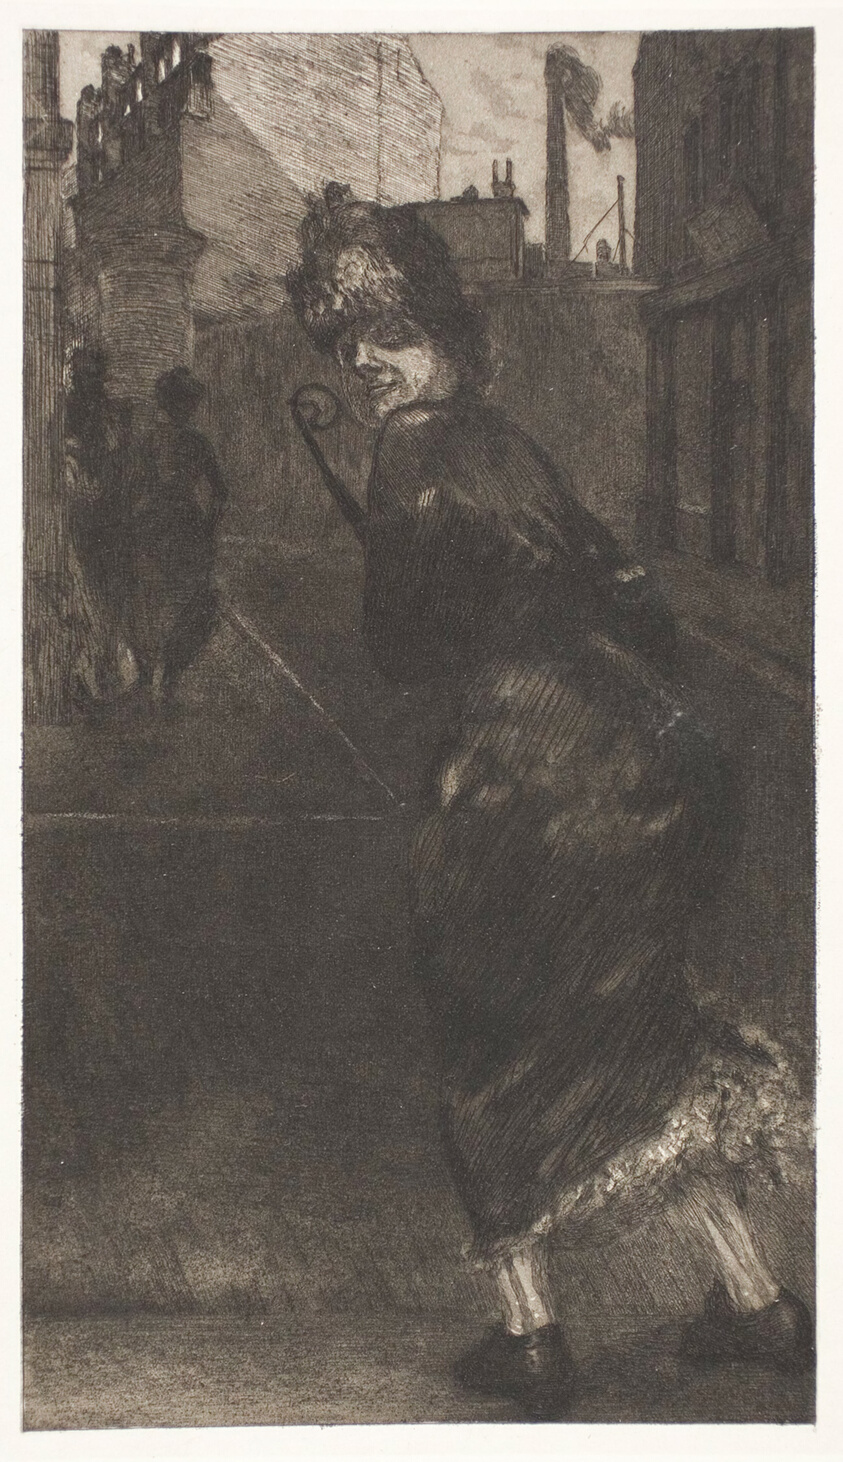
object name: Print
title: On the Street, plate nine from A Life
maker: Max Klinger (German, 1857-1920); printed by Otto Felsing (German, 19th century)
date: 1884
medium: Etching and aquatint, with stipple on ivory China paper, laid down on cream laid paper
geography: Germany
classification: etching; print; prints and drawing